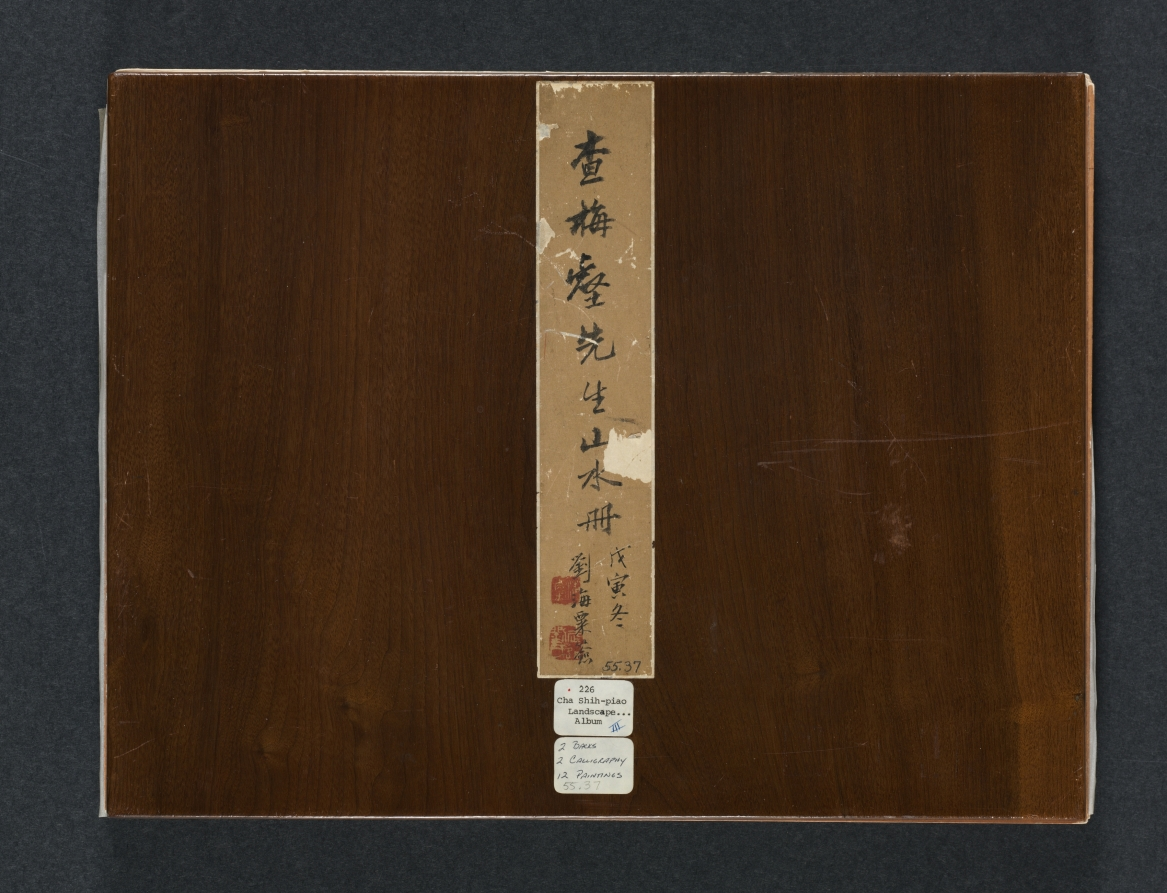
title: Album of Seasonal Landscapes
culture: China, Qing dynasty (1644-1911)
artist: Zha Shibiao (Chinese, 1615–1698)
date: 1684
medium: Album of twelve leaves; ink or ink and light color on paper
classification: Painting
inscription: Artist's inscriptions, signatures, and 16 seals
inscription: 2 colophons and 12 additional seals: 1 colophon and 1 seal of Ma Yueguan 馬曰琯 (1688–1755); 1 colophon, dated 1759, and 1 seal of Huang Cou 黃湊; 2 seals of Liu Haisu 刘海粟 (1896-1994)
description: Zha Shibiao, a native of Anhui province, moved to Yangzhou later in his career, like so many of his fellow countrymen. At age 68, he painted this album with seasonal landscapes in various styles. Painted in fresh colors and wet strokes, all depict typical scenes of Jiangnan, the Yangzi delta: a herdboy on a buffalo wading through water, boating on the stream to the Peach Blossom Spring at Wulin, a waterfront town shrouded in mist, a scholar on his donkey enjoying the red autumn leaves, and drinking tea on a boat while watching migrating birds.